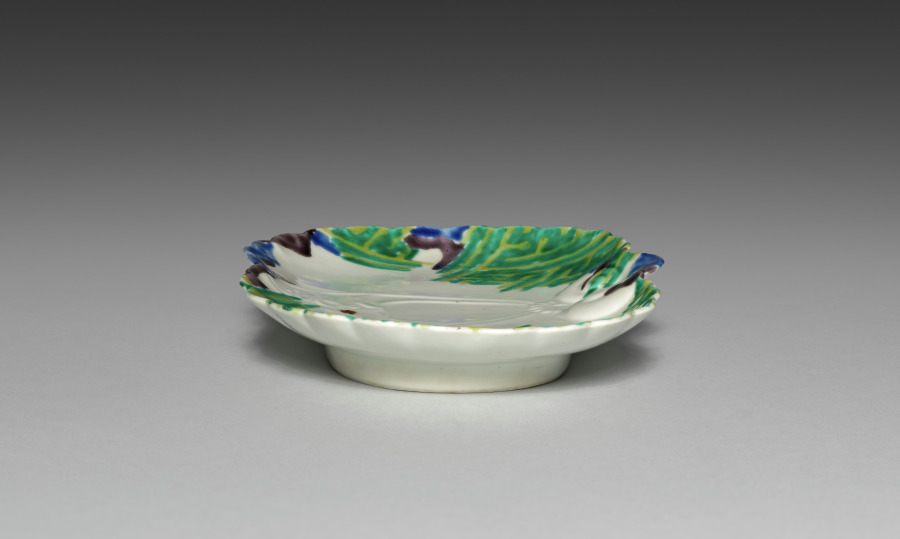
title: Ginkgo Leaf-Shaped Small Dish (Kozara) with Stylized Key-Fret Design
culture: Japan, Edo period (1615–1868)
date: mid-1600s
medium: Porcelain with molding and overglaze color enamel (Hizen ware, Matsugatani kilns, Nabeshima type)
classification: Ceramic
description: This dish combines a precisely molded shape with a freehand design in overglaze color enamels.